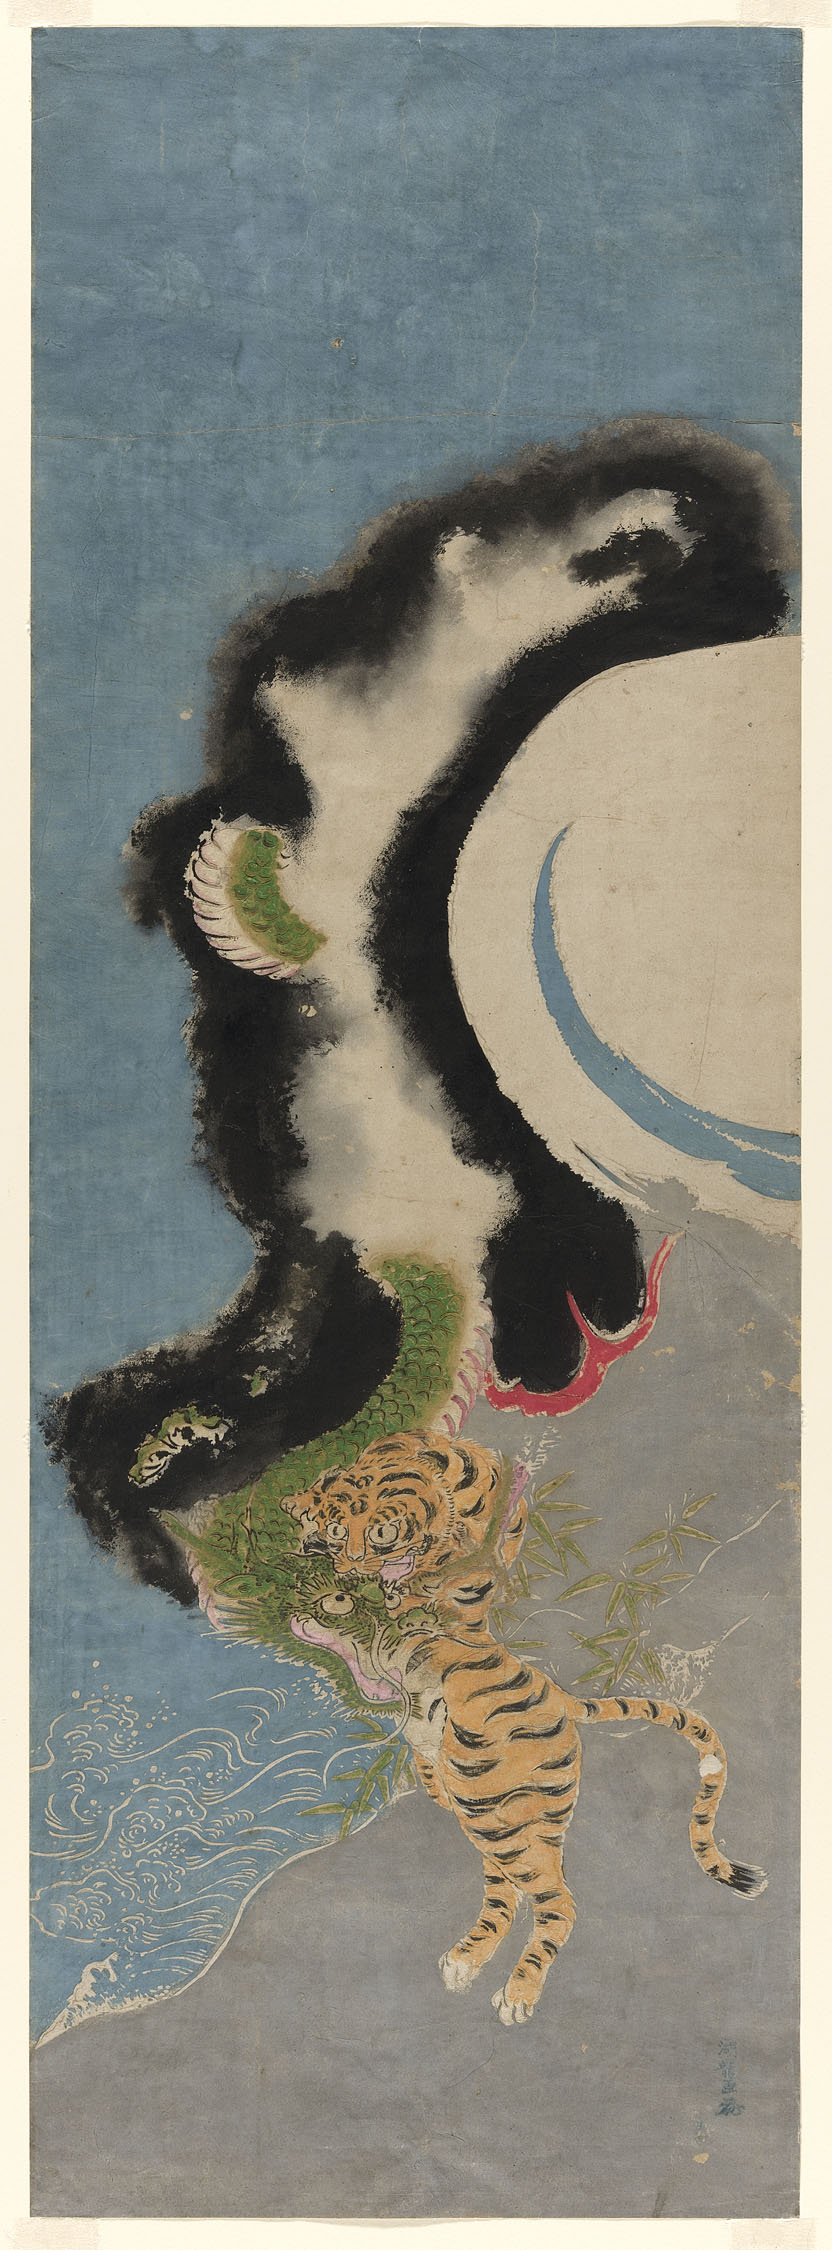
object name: Print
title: Dragon and tiger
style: Japanese (culture or style)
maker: Isoda Koryusai (Japanese, 1735-1790)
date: c. 1780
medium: Hand-colored woodblock print; vertical oban diptych, shomen-ban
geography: Japan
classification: woodblock print; print; asian art